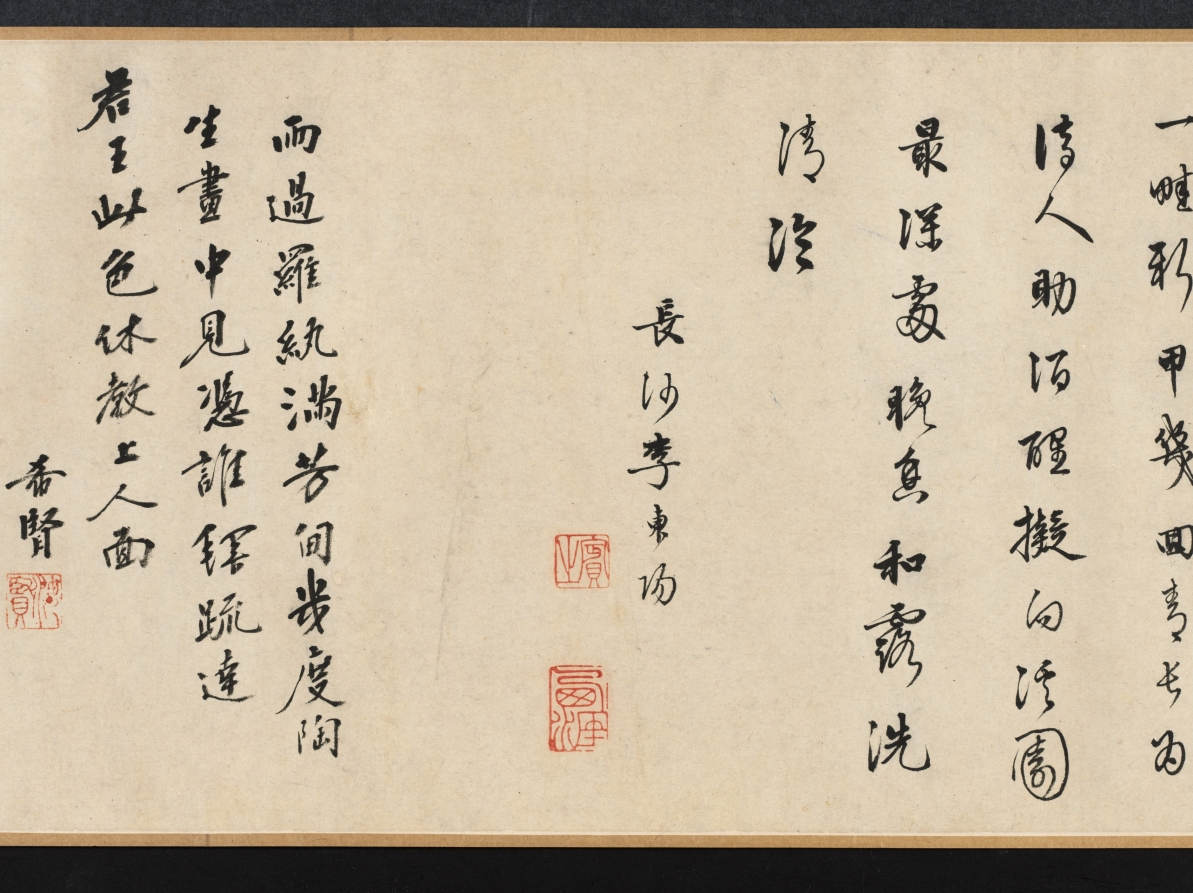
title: Chrysanthemums and Cabbage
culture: China, Ming dynasty (1368–1644)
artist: Tao Cheng (Chinese, active c. 1471–after 1502)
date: c. 1486 or before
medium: handscroll, ink and slight color on paper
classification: Painting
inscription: Artist's seal at beginning of painting: Yun hu 雲湖. Title by Wang Wenzhi 王文治 (1730–1802), date 1756. 2 seals of Wang Wenzhi 王文治 (1730-1802); 3 seals of Ku Yün (n. d.)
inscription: Section A (Chrysanthemums): 1 poem and 1 seal of Zhang Yuanzhen 張元禎 (1437–1507) - Jinshi, 1461; 1 poems and 3 seals of Ni Yue 倪岳 (1444–1501) - Jinshi, 1464; 1 poems and 2 seals of Zhao Xiang 趙祥 (life dates unknown) - Jinshi, 1469; 1 poems and 1 seals of Wu Xixian 吳希賢 (1437–1489) - Jinshi, 1464; 1 poems and 1 seals of Lü Chang 呂㦂 (1449–1511) - Juren, 1471; 1 poems and 3 seals of Fu Han 傅瀚 (1435–1502) - Jinshi, 1464; 1 poems and 1 seals of Feng Jue 馮珏 (life dates unknown) - Jinshi, 1478.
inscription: Chrysanthemums section, poem 1, by Zhang Yuanzhen 張元禎 (1437–1507): Several bushes of chrysanthemums grow in front of the Five-Willow Cottage,/ The yellow ones are really yellow and the white ones white./ This affable and decent fellow, young in years and unsophisticated,/ Has snapped one of the branches to dip in ink. (The Five-Willows Cottage was the home of the poet Tao Qian 陶潛 (Tao Yuanming 陶淵明, AD 365-427).) Chrysanthemums section, poem 2, by Ni Yue 倪岳 (1444–1501): Where at the Eastern Fence can you grieve for the Soul of the Xiang River?/ A man of upright character is mourned within the traces of ink./ White jade with a slight flaw would be a grievance forever,/ Later men should understand why even the roots of the flowers are washed. (Eastern Fence refers again to the poet Tao Qian 陶潛, while the Soul of the Hsiang River refers to the poet Qu Yuan 屈原 (c. 340–278 BC).) Chrysanthemums section, poem 3, by Zhao Xiang 趙祥 (life dates unknown): A clump of chrysanthemum grows in front of the bamboo pavilion,/ The winds of many autumns have blown since we parted beyond the river./ Straining wine through the official's cap of Tao [Qian] to prolong autumn's pleasures,/ The mists and clouds of ten thousand miles belong to the intoxicated. Chrysanthemums section, poem 4, by Wu Xixian 吳希賢 (1437–1489): It is a different spring if mulberry is planted during the latter part of the year,/ The dust of the world originally did not drop on clothing./ Who spills out ink under the Eastern Fence/ And paints so freely this portrait of chrysanthemums for the venerable Sir Tao? Chrysanthemums section, poem 5, by Lü Chang 呂㦂 (1449–1511): This full tray of ink for painting [flowers] at the Eastern Fence;/ Their whiteness or yellowness is not essential in capturing their beauty./ I don't have to go to Jiangnan to see them myself./ At my old house grow two or three branches. Chrysanthemums section, poem 6, by Fu Han 傅瀚 (1435–1502): Who daubed autumn flowers with ink/ As if they were dark dew on a branch tip only vaguely seen at evening?/ After the lazy clouds disperse, no one paints;/ A certain unconventionality pervades this painting. Chrysanthemums section, poem 7, by Feng Jue 馮珏 (life dates unknown): To satisfy his hunger, [the chrysanthemums] have at times entered the poetry of Qu Yuan;/ Taking up the wine cup, it felt close to Tao Qian./ [With them I am like] a lonely root sustained by deep water/ Or an old man to whose hair the color of youth returns.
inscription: Section B (Cabbage): 1 poem and 1 seal of Cai Qi 蔡圻 (life dates unknown) - degree information not known; 1 poems and 3 seals of Ni Yue 倪岳 (1444–1501) - Jinshi, 1464; 1 poem and 3 seals of Jiao Fang 焦芳 (1436–1517) - Jinshi, 1464; 1 poem and 3 seals of Li Dongyang 李東陽 (1447–1516) - Jinshi, 1464; 1 poems and 1 seals of Wu Xixian, signed “Xixian” 吳希賢 - Jinshi, 1464; 1 poems and 3 seals of Fu Han 傅瀚 (1435–1502) - Jinshi, 1464; 1 poems and 1 seals of Lü Chang 呂㦂 (1449–1511) - Juren, 1471; 1 poems and 2 seals of Zhao Xiang 趙祥 (life dates unknown) - Jinshi, 1469; 1 poems and 1 seals of Feng Jue 馮珏 (life dates unknown) - Jinshi, 1478.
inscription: Cabbage section, poem 1, by Cai Qi 蔡圻 (life dates unknown): The ink splashes are fresh from a frosty brush dipped in pond water;/ I can visualize that time when Yunhu 雲湖 [Tao Cheng] first showed his talents./ I lament the places where I scribbled before,/ Who would open them to inscribe a poem? (The first line is an allusion to the famous Jin dynasty calligrapher Wang Xizhi 王羲之 (AD 303-361), who practiced calligraphy so diligently at the edge of a pond that the water turned black with ink.) Cabbage section, poem 2, by Ni Yue 倪岳 (1444–1501): After rain the vegetables begin to grow;/ How are the colors of the masses lately!/ Once you get used to them, the tastiest parts are the ends of the roots;/ I don't know if they can be used for "seasoning soup." ("Seasoning soup" is an allusion to the statesmanship of a chief minister.) Cabbage section, poem 3, by Jiao Fang 焦芳 (1436–1517): This crop of purple stalks and green leaves is late and irregular;/ Now the rainy season is over for the Eastern Garden./ All the nobles nowadays dine on meat;/ Who of them knows the flavor of this [cabbage]. Cabbage section, poem 4, by Li Dongyang 李東陽 (1447–1516): It's always helped the honest man to sober up after drinks./ I intend to go to the deepest part of the stream-crossed garden/ To refresh myself in the fragrance and dew of evening. Cabbage section, poem 5, by Wu Xixian 吳希賢 (1437–1489): After rain, the white silk is filled with fragrant vegetables;/ How many times this happens in Mr. Tao's paintings./ On whom will you depend to present a memorial to the ruler?/ Don't let this color emerge on the faces of the people. (The last line is meant as a warning to officials: the color of the vegetables (green) may be pleasing in itself, but when it emerges on the faces of the starving poor, it signifies a badly governed world.) Cabbage section, poem 6, by Fu Han 傅瀚 (1435–1502): For twenty years I have feasted on the excellent mutton of an official;/ Yet I talk and dream about the garden and its vegetables./ Do not merely say it is good to chew the root of the cabbage--/ You must taste to understand what poverty is. Cabbage section, poem 7, by Lu Chang 呂㦂 (1449–1511): The capital is never a place for an apprentice in the "garden of scholarship."/ Who would write about gardens and vegetables on an examination paper?/ I've walked throughout the country in spring;/ Make sure the people don't show this color. Cabbage section, poem 8, by Zhao Xiang 趙祥 (life dates unknown): After a wash of rain, the spring garden is still in order;/ The flavor [of the cabbage] is more suitable with a small drink and the hum of a tune./ The rich and powerful in their mansions consume dish after dish of meat;/ Vegetarian food is known only by the scholars. Cabbage section, poem 9, by Feng Jue 馮珏 (life dates unknown): A new cabbage is nourished with dew;/ It takes a long time to grow and mature./ The business of "seasoning the soup" is your responsibility;/ Better command the gardener to take care [of the cabbages]. trans. HK/LYSL/WKH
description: On an autumn day in Beijing, Tao Cheng had a gathering with a group of scholar-officials and created two paintings in a spontaneous, casual style. The first depicts chrysanthemums, slender bamboo stalks, and a rock in monochrome ink. Tao applied light colors for the second painting that depicts cabbage. Tao deliberately placed the images on the first sections of the paper so that his honorable guests could add their poetic inscriptions inspired by his imagery. In the first section to the right, all seven poetic inscriptions refer to the beloved poet and recluse Tao Qian (also called Tao Yuanming, AD 365–427) who was particularly known for his profound love for chrysanthemum flowers. Most of the inscriptions in the second section express sympathy for the poor, since cabbage is the main ingredient in their humble food. Taken together, the poems and paintings allude to the life and responsibilities of the scholar-official: the importance of both an upright character and a concern for the poor citizens in order to achieve good government.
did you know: Eminent calligrapher Wang Wenzhi 王文治 was only 27 sui when he wrote the title in 1756.